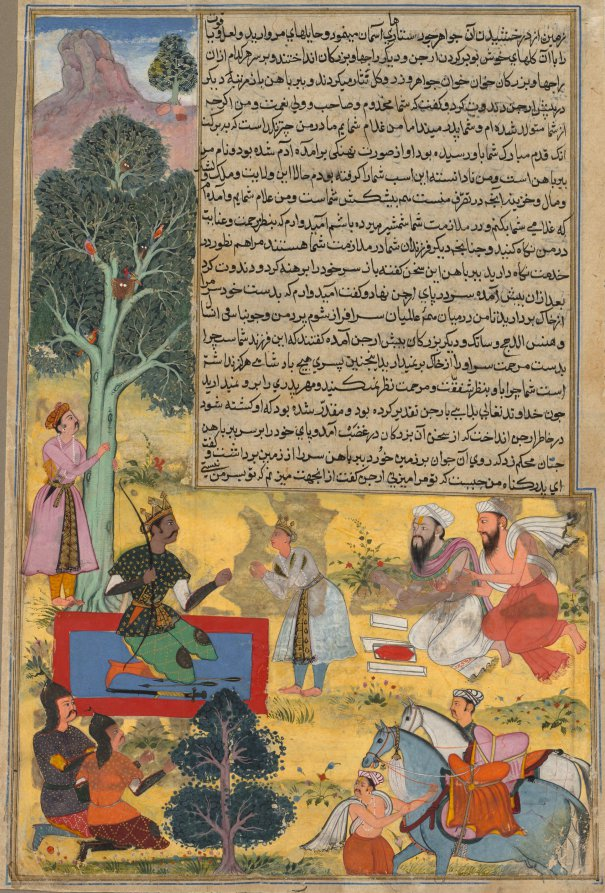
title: Vabhruvahana Approaches Arjuna, page from the Khan Khanan's Razm-nama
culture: India, Subimperial Mughal school, 17th century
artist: Sur Das Gujarati (Indian, active 16th century)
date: c. 1610?–17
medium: Gum tempera, ink, and gold on paper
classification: Painting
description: A tree with a whimsically mint-green trunk populated with birds and nests with eggs appears to the left of the block of text, in which the action below is described in Persian. Under the tree on a blanket is Arjuna, one of the main heroes of the Razm-nama. He is an extraordinary warrior and holds his bow as he receives his son Vabhruvahana, who has come to apologize for having captured the horse of the royal horse sacrifice––a major indiscretion.